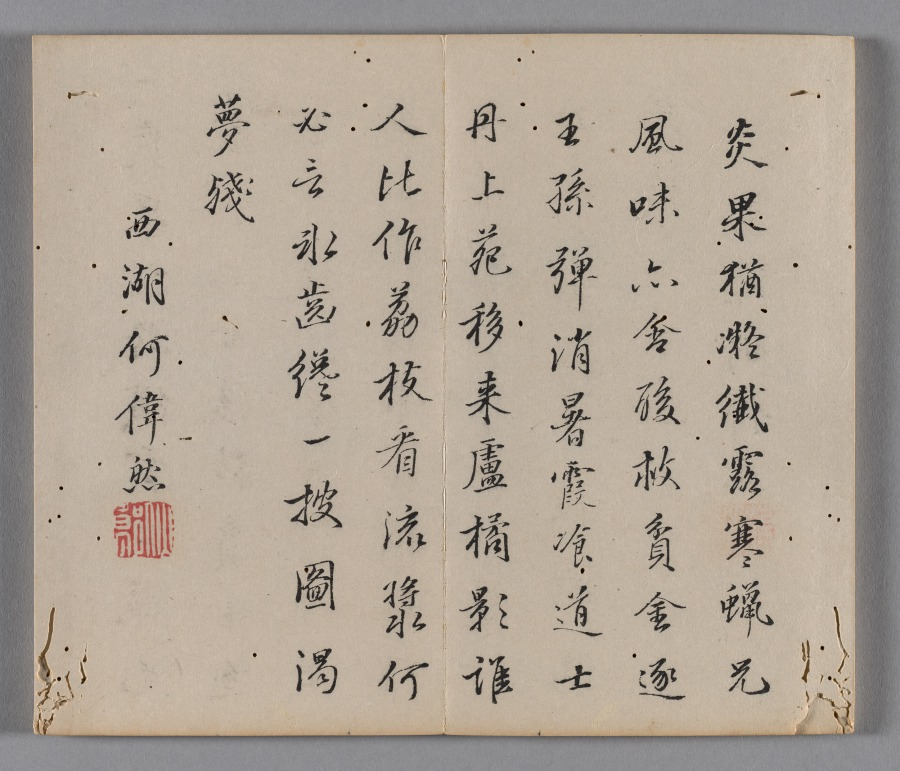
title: Ten Bamboo Studio Painting and Calligraphy Handbook (Shizhuzhai shuhua pu): Fruit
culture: China, Qing dynasty (1644-1911)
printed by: Hu Zhengyan (Chinese, c. 1584–1674)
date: 1633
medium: Woodblock-printed book; ink and colors on paper; first edition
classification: Print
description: Color printing reached a level of perfection in the early 1600s, as seen in this Ten Bamboo Studio Collection of Calligraphy and Painting and the Mustard Seed Garden Manual of Painting (printed 1679 and 1701). The painterly quality, precision in registering (aligning) the woodblocks, and harmonious colors made them the most successful color print editions in Chinese history. Both editions were printed and compiled in Nanjing, spread nationwide, and had a great impact on the arts in Japan and Korea.